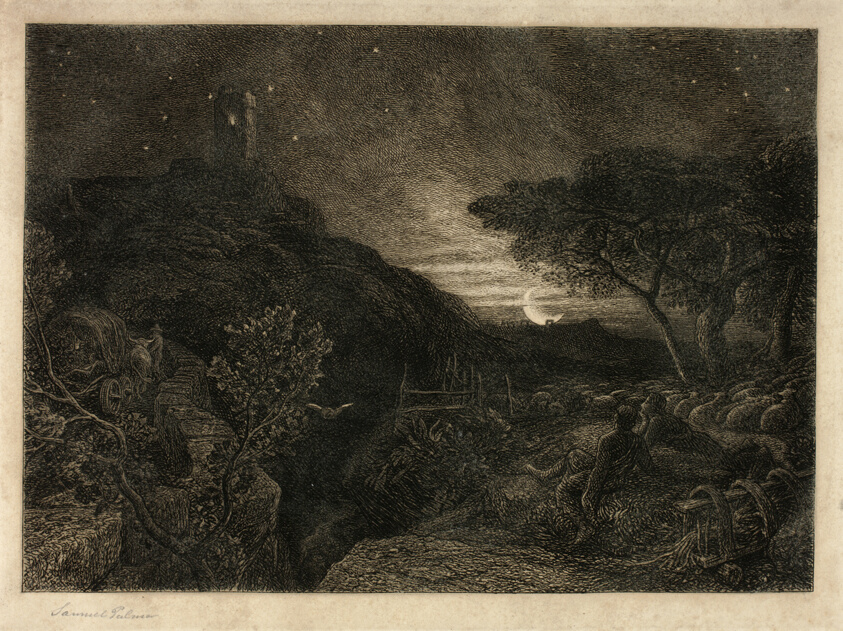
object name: Print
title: The Lonely Tower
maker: Samuel Palmer (English, 1805-1881)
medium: Etching in black on paper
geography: England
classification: etching; print; prints and drawing